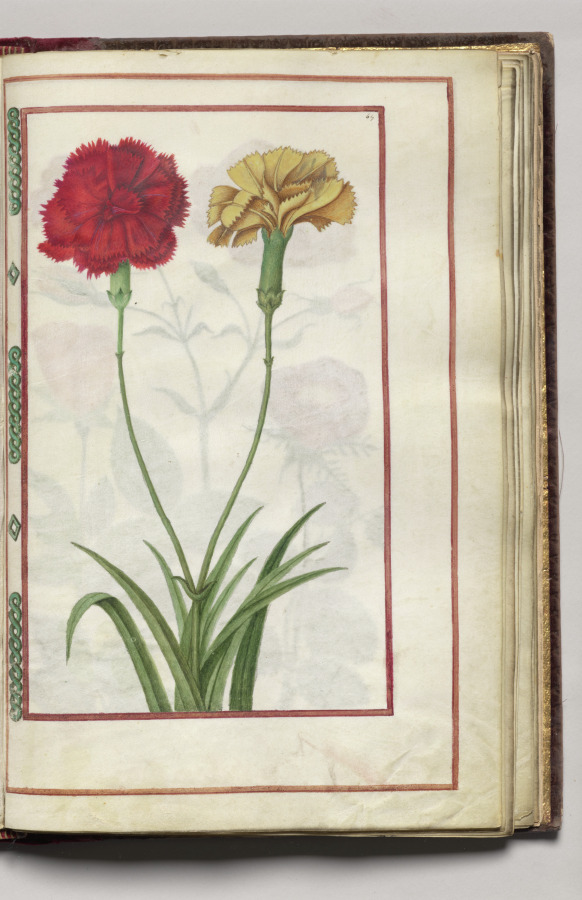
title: Red and Yellow Carnations, folio 33 (recto), from Florilegium (A Book of Flower Studies)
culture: France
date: 1608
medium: watercolor, ink, silver, and gold over occasional traces of pencil, on vellum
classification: Bound Volume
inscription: Dated: Poitiers 1608 (on frontispiece) Signed: On frontispiece in black ink, lower right: Van Kuyk Notation on drawing: Frontispiece: in pencil, lower margin: * élève de Van Kessel, peintre flammand (* in pencil also appears in front of Van Kuyk's name).